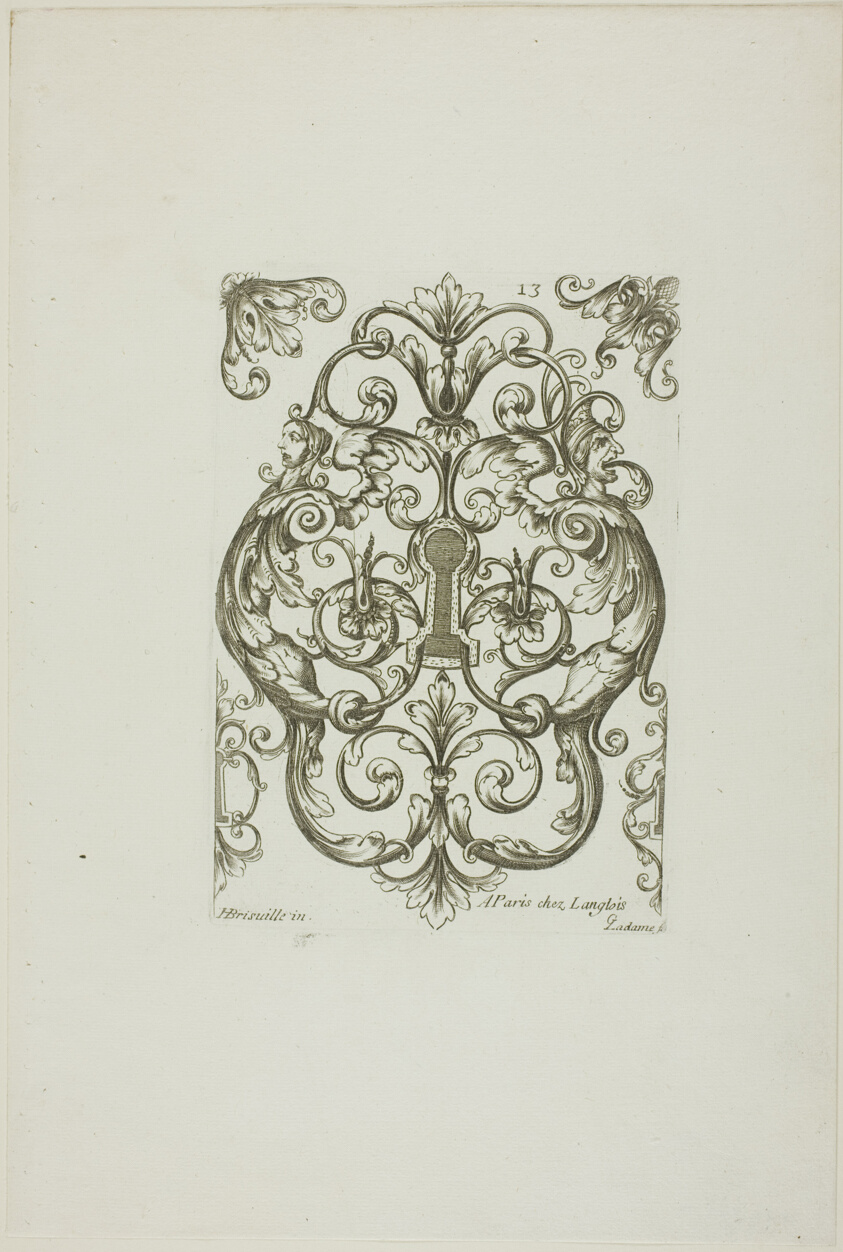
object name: Print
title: Designs for Locksmiths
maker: Jean Bérain I (French, 1640-1711); after Hugues Bris e Ville (French)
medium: Etching on paper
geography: France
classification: etching; print; prints and drawing